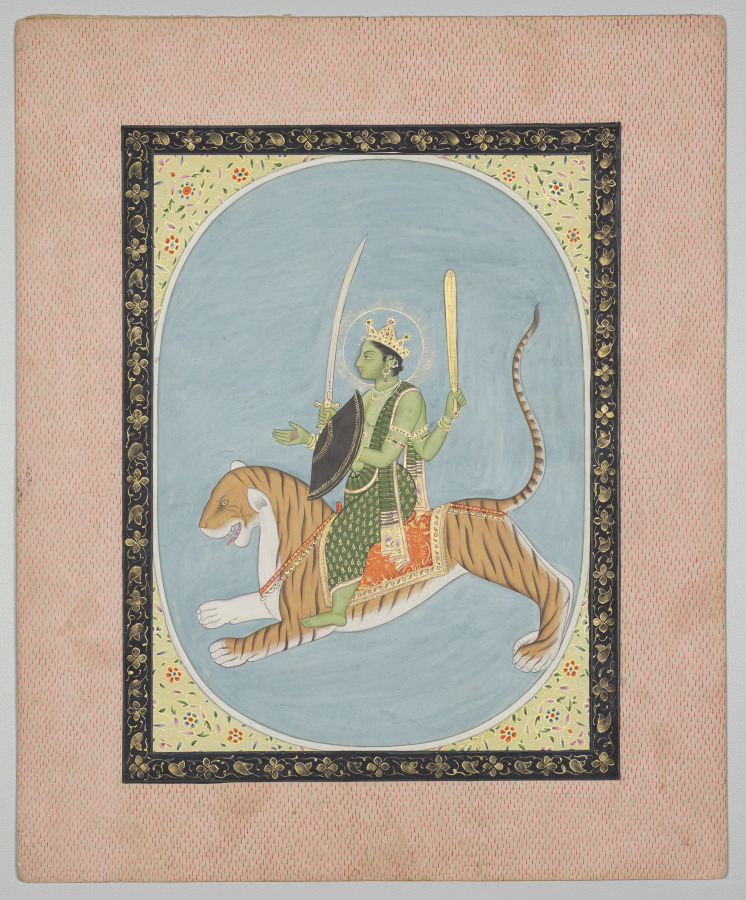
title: Mars, from a Mandi Astrology Series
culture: Northern India, Pahari kingdoms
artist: attributed to Sanju (Indian, active late 1700s–early 1800s)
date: c. 1810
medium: Gum tempera and gold on paper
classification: Painting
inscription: On the verso is the number four, in devanagari notation, written on the top and bottom edges.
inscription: The purple stamp of the kingdom of Mandi’s royal library bears the handwritten number 1268. Above is the number 22.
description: This page is from a series of paintings featuring astrological subjects, including personifications of planets and signs of the zodiac. Historically in India, the auspicious conjunction of planets with certain calendar dates was important for determining when to schedule events or ceremonies. Mars is depicted as a warrior with green skin and riding a tiger through the sky.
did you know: The god Mars in Roman mythology is also a warrior.